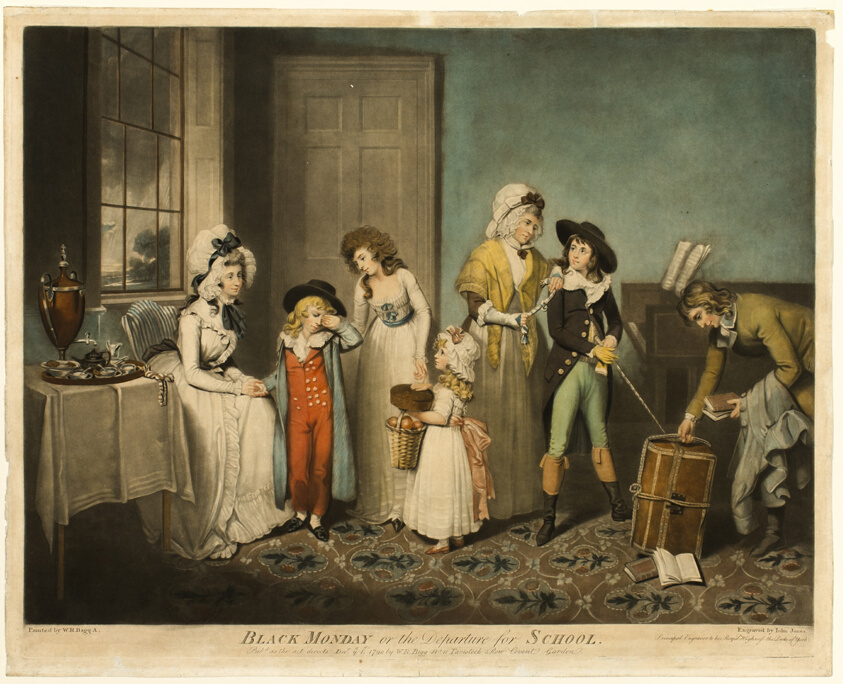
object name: Print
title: Black Monday, or the Departure for School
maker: John Jones (English, 1745-1797); after William Redmore Bigg (English, 1755-1828)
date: published December 1, 1790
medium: Hand-colored mezzotint on laid cream paper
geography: England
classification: mezzotint; print; prints and drawing